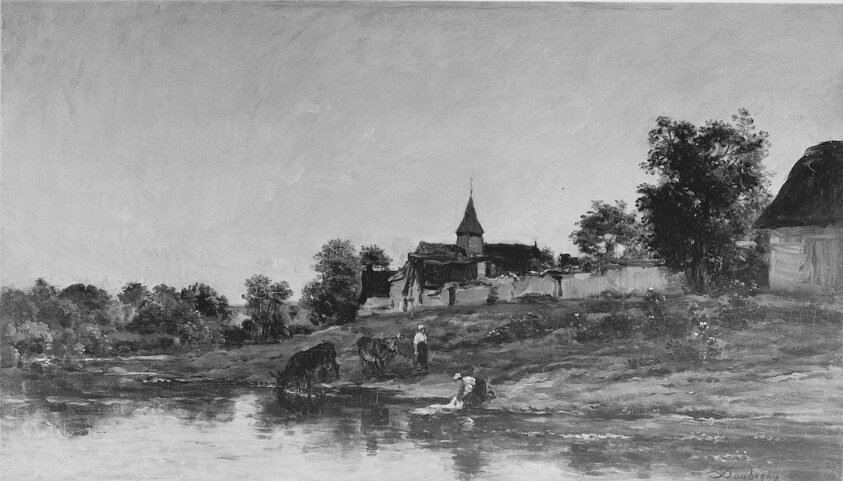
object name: Painting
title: On the Bank of the Seine at Portejoie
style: Barbizon School, 19th century, nineteenth century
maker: Charles François Daubigny (French, 1817–1878)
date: c. 1865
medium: Oil on panel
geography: France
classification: oil on panel; france; french; oil paintings (visual works); paint; painting; european painting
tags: river, animals, bank, church, clothes, clothing, cows, France, French, hills, landscape, rural life, towns, trees, wall, water, women